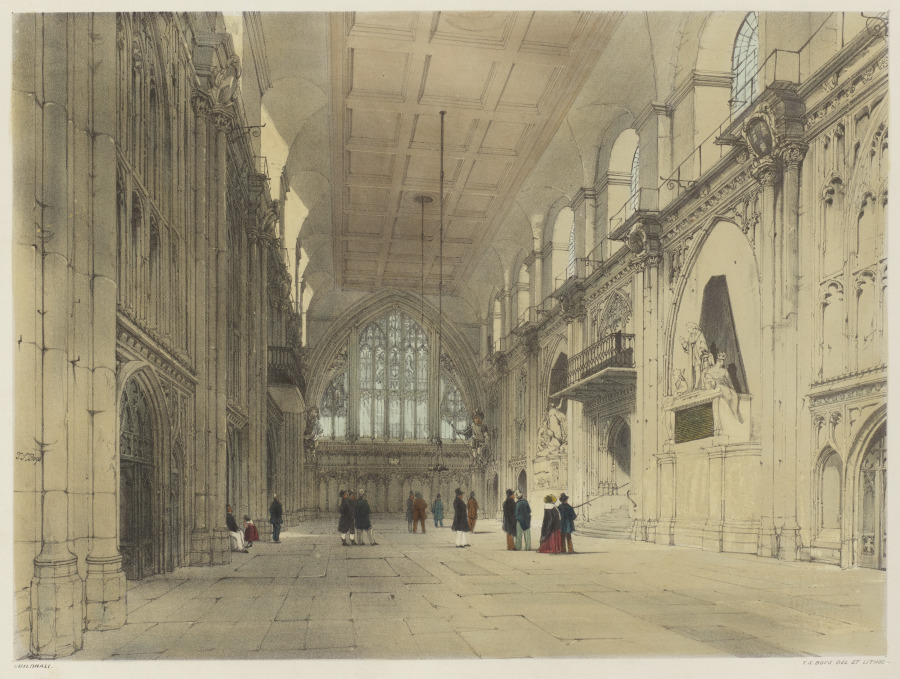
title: London As It Is: Guildhall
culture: England, 19th century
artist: Thomas Shotter Boys (British, 1803–1874)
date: 1842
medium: lithograph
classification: Bound Volume